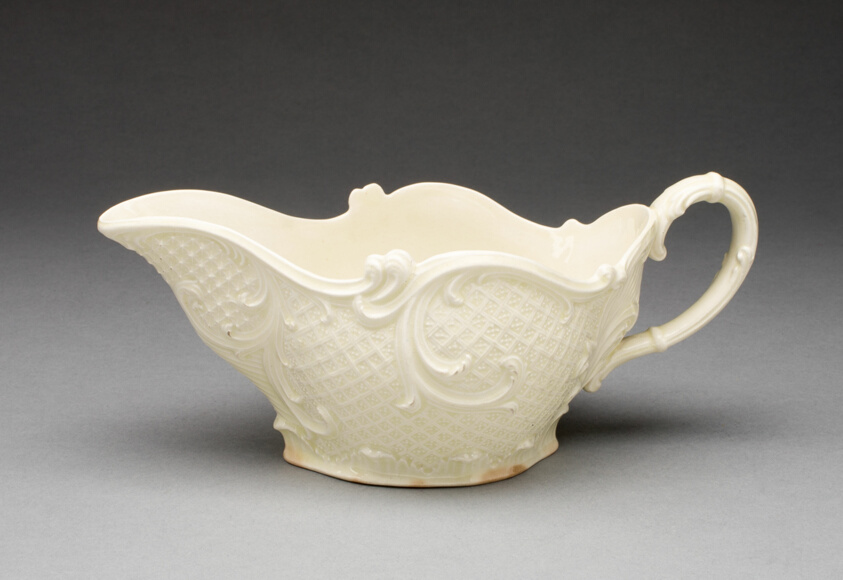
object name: Ceramics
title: Sauceboat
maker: Wedgwood Manufactory (England, founded 1759)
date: 1750/60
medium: Lead-glazed earthenware (creamware)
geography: Burslem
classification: creamware (queensware); earthenware; european decorative arts; ceramics